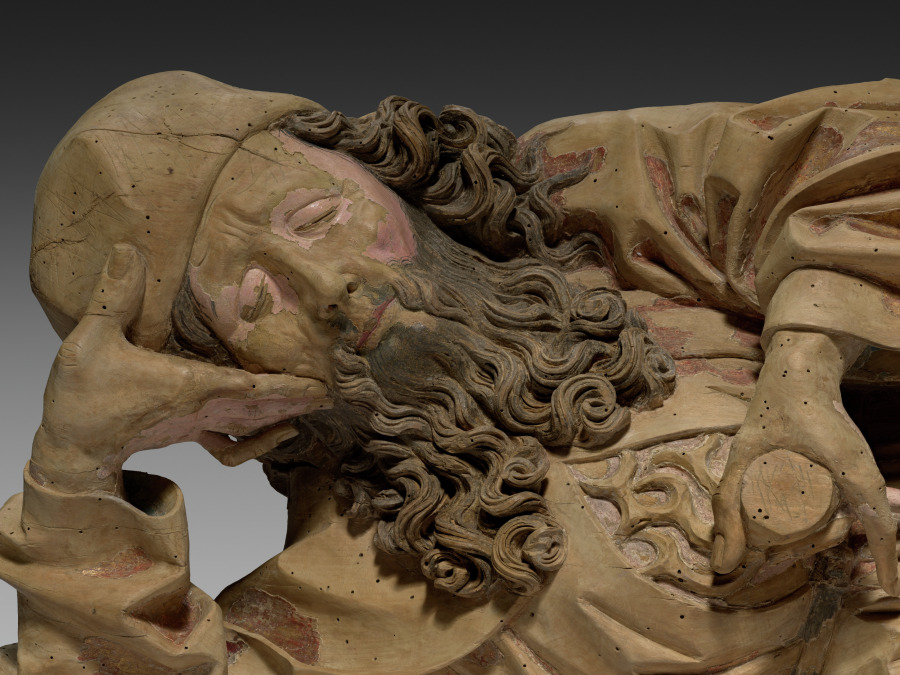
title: Jesse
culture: Germany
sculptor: Veit Stoss (German, c. 1445–1533)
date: c. 1500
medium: Limewood, polychromed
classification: Sculpture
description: The figure shows the sleeping Jesse, the father of David from the Old Testament. As the ancestor of the family tree of Christ, he was depicted in the Middle Ages sleeping as the starting point of the tree, on whose branches the ancestors of Christ are depicted. Mary with the Christ child is always shown at the top. The figure comes from a wooden altarpiece from an unknown church, possibly in Nuremberg, which is now lost. Veit Stoss is one of the most prominent German sculptors around 1500 who was mainly active in Nuremberg (Bavaria, Germany) and Krakow (Poland), also as a painter and engraver.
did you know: The family tree of Christ starts from Jesse, the father of David in the Old Testament.